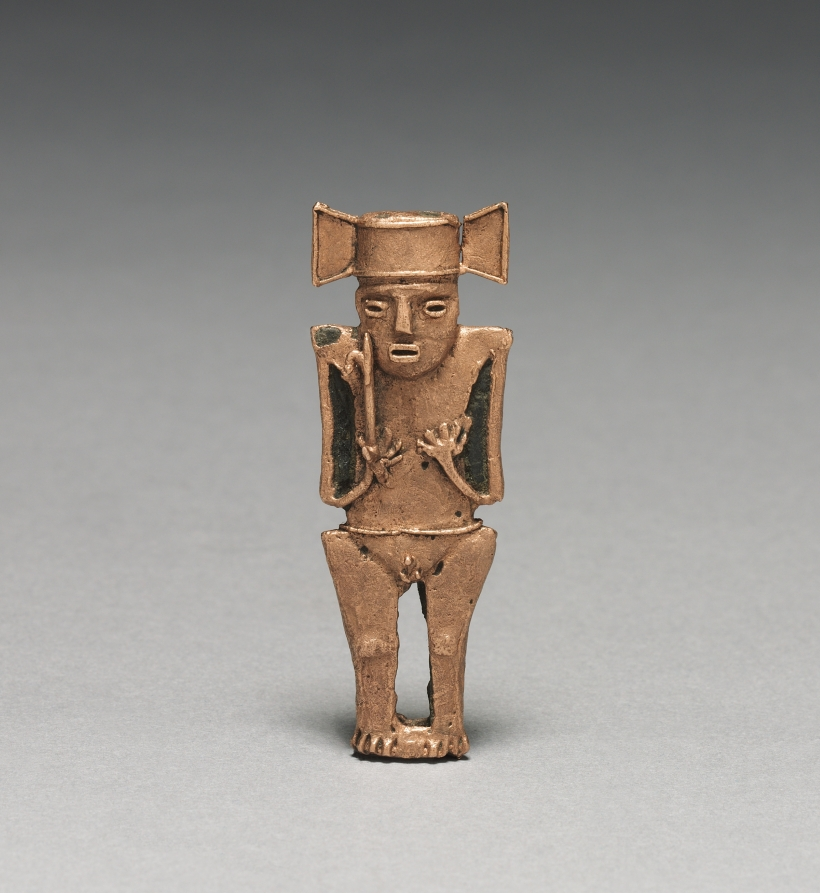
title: Tunjos (Votive Offering Figurine)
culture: Colombia, Muisca style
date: c. 900–1550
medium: cast gold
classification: Metalwork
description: Unlike the other gold ornaments in this gallery, tunjos were not worn; instead, they served as offerings that were deposited in sacred places, such as lagoons and caves. They often depict humans who hold something-here a container with a head (1947.22), a spear thrower (1947.19), and a bird-tipped (1957.25). The subject must have corresponded to a benefit being asked from the gods. Perhaps because they were not meant for display, tunjos were not finished after lost-wax casting. Flaws remain uncorrected, surfaces are unpolished, and gold that backed into the sprue (pouring channel) was left in place, creating the button-like form at the bottoms of 1947.24 and 1947.17, which were cast upside down.